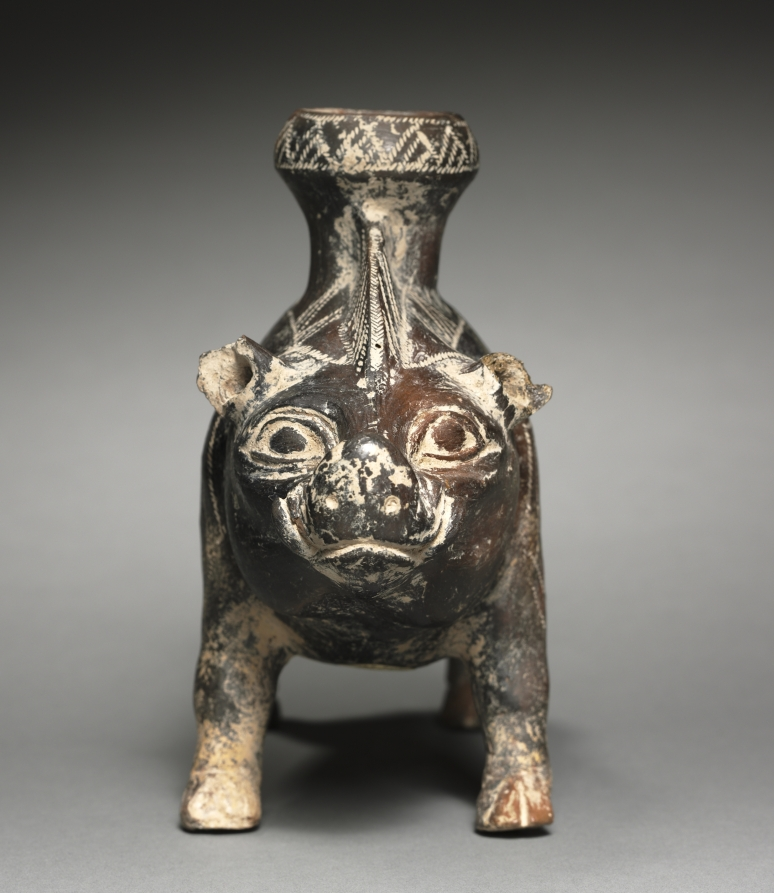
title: Vessel in the Shape of a Wild Boar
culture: Italy, Etruscan or modern forgery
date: 700–500 BCE or 1900s CE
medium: terracotta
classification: Ceramic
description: Wild boars were a favorite motif in classical antiquity, but this vessel has long puzzled scholars. Its brown, burnished surface, with incised geometric decoration, recalls Etruscan impasto pottery from as early as the seventh century BC. The naturalistic shape of the boar, however, resembles terracotta vessels made in the fifth century BC or later. Recent scientific analysis suggests that this vessel may have been made in the 20th century, and our curators and conservators are continuing their research.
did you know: This boar enjoyed brief internet fame, with a series of online memes peaking in 2018.